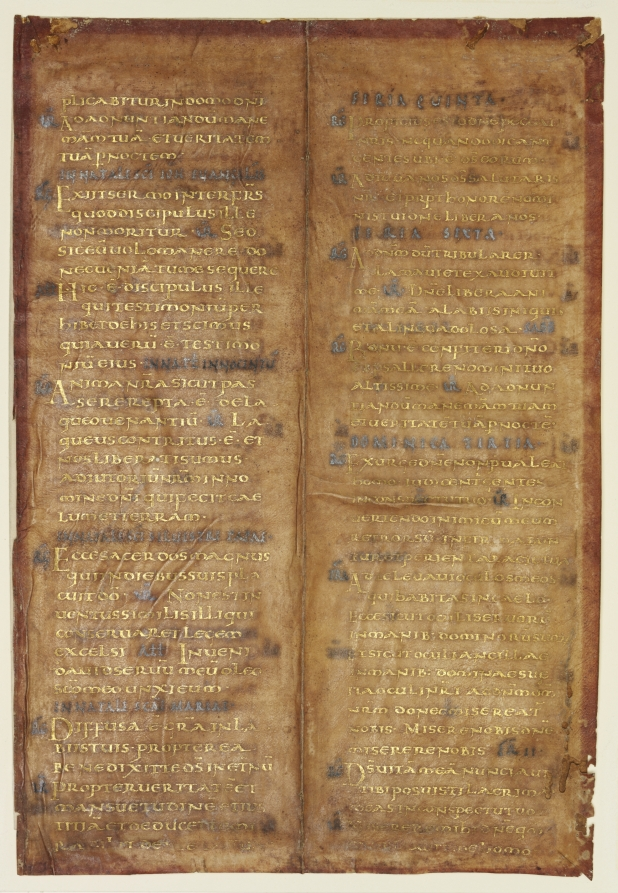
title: Bifolium Excised from a Carolingian Gradual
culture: Germany or Northeastern France, 9th century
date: c. 830–60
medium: gold and silver ink on purple parchment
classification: Manuscript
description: This rare leaf comes from a cantatorium or gradual, a book containing the chants to be sung during the Mass. Other leaves from the same book survive in Berlin and Trier. As a bifolium, or double-leaf, it does not contain decorated letters but rather "emphasized" letters. These were enlarged and pushed out into the margins to catch the reader's eye. Such emphasized letters originated in late classical times and were the precursor to the decorated initial developed by medieval scribes. The purple-stained vellum (now faded to a deep pink) with its text written in gold and silver inks (now turned black) suggested great luxury with its sumptuous appearance. In Mediterranean regions, the purple dye was obtained from murex, a shellfish dye. In northern Europe, plant dyes were used as an alternative. Combined with the use of gold and silver ink a spectacular appearance was achieved that is traceable back to classical antiquity.